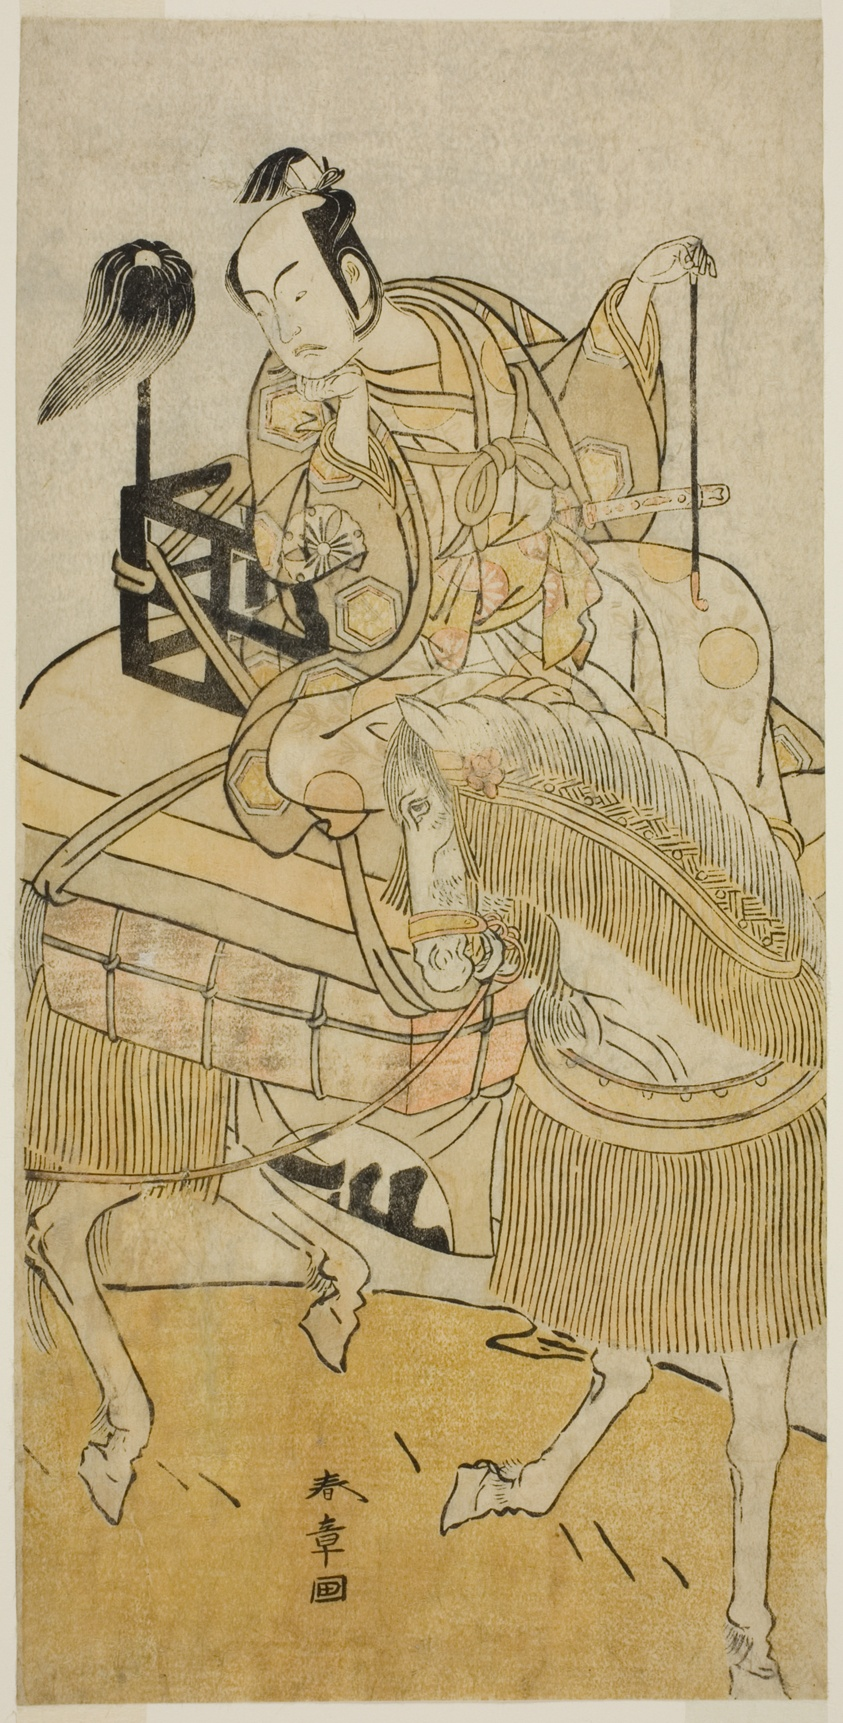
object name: Print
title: The Actor Matsumoto Koshiro IV as Ogata no Saburo Disguised as Matsuura Saemon in the Play Ichi no Tomi Tsuki no Kaomise, Performed at the Morita Theater in the Eleventh Month, 1774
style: Japanese (culture or style)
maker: Katsukawa Shunsho 勝川 春章; Japanese, 1726-1792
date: c. 1774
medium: Color woodblock print; hosoban; from a multisheet composition (?)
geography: Japan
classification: woodblock print; print; asian art